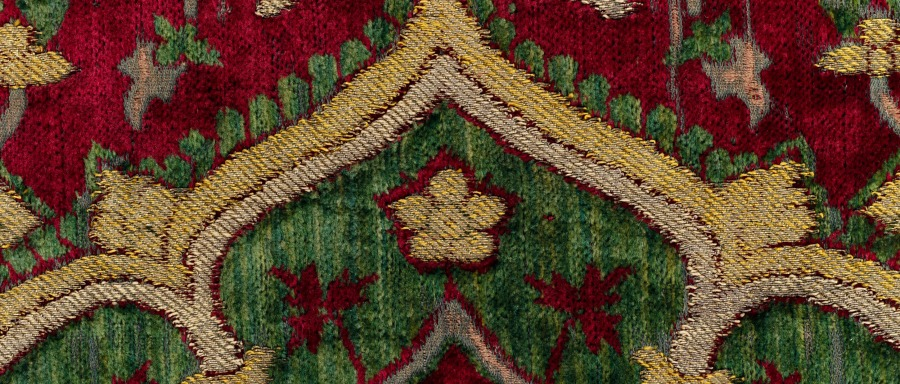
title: Brocaded Velvet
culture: Turkey, early 16th Century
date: c. 1500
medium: velvet: silk, brocaded with gold and silver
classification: Velvet